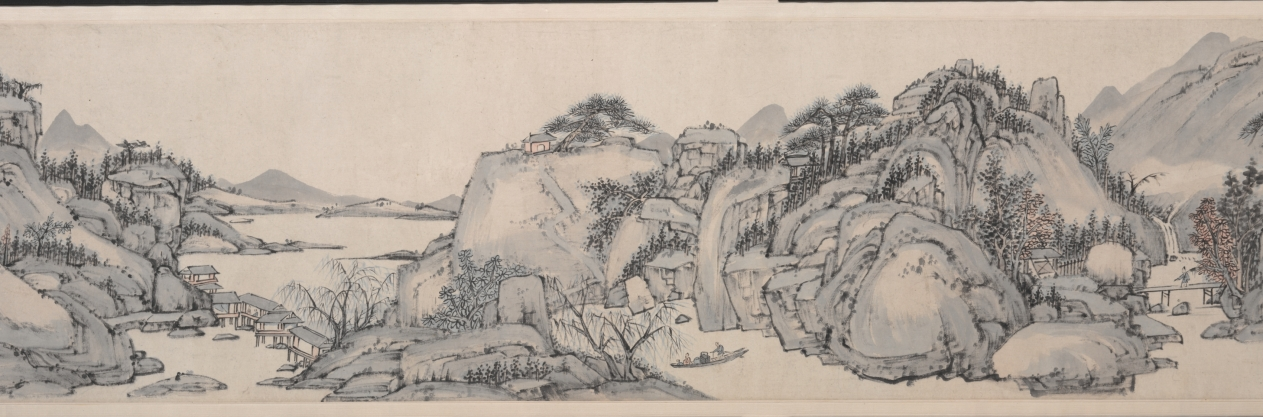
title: Pure Tones among Hills and Waters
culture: China, Qing dynasty (1644-1911)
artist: Xiao Yuncong (Chinese, 1596–1673)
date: 1664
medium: Handscroll; ink and light color on paper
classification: Painting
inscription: 種松發秀色，具是高人心。/ 鑿石築茅屋，長年覆綠陰。/ 白雲無意出，舒卷趨空林。/ 萬籟時一寂，微風墮清音。/ 此情莫可擬，此景誰能論。/ 只向千峰裏，共彈五絃琴。/ 桃花依綠水，不覺又春深。 甲辰花朝題于青蓮閣, 鐘山老人蕭雲從。[印] 鐘山老人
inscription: Title and inscription, dated 1744, and 3 seals of Shen Feng 沈鳳 (1685-1755).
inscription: 4 colophons and 24 additional seals: 1 colophon, dated 1811, and 5 seals of Xiang Yuan 項源 (active about 1811); 1 colophon, dated 1858, and 2 seals of Qi Junzao 祁寯藻 (1793-1866); 1 colophon and 4 seals of Zhang Yunzhong 張允中 (1881–1960?); 4 seals of Jiang Xun 江恂 (active about 1753–after 1780); 1 colophon dated 1943, and 2 seals of Wang Shaoming 汪兆銘 (Wang Jingwei 汪精衛, 1883–1944); 1 seal of Qi Zhiliu 祁之鏐 (active about 1858); 2 seals of Yu Zhimeng 俞芷盟 (second half of 19th century); 4 seals unidentified.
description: Painted at age 68, this landscape is one of Xiao Yuncong’s most mature works. Extraordinary in its combination of fine details with bold brushstrokes and bluish washes, it is also one of his longest compositions in handscroll format, extending over 23 feet. Throughout his lifetime, Xiao visited Nanjing and Yangzhou, where he met with other painters and literati. Regarded as the founder of the Gushu school (姑孰派) of painting, Xiao painted from nature, and his landscapes are informed by his travels, as well as by his experience as a print designer.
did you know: Biographical notes on Xiao Yuncong relate that he did not pursue the career of an official, but "furnished a cottage in the eastern suburbs [of Wuhu in Anhui province] and amused himself playing the qin (zither) and reading every day."